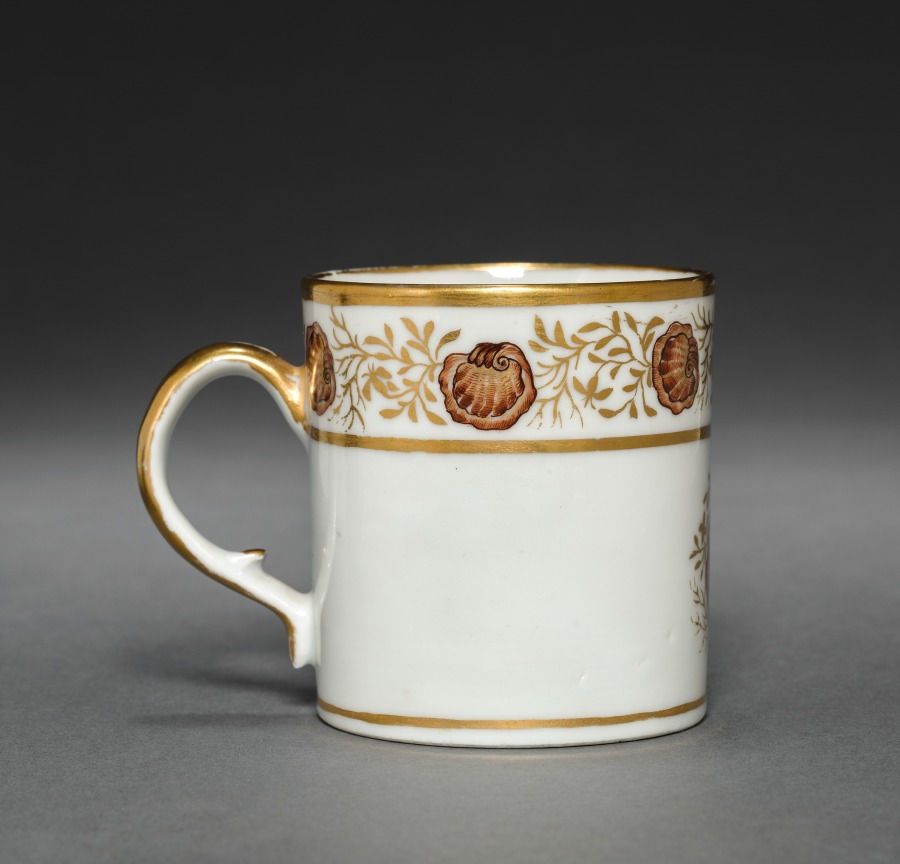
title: Cup from Oliver Wolcott, Jr. Tea Service (5 of 6)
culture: Chinese Export porcelain, late 18th-early 19th century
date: 1785–1805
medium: porcelain, sepia enamel, gold leaf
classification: Ceramic